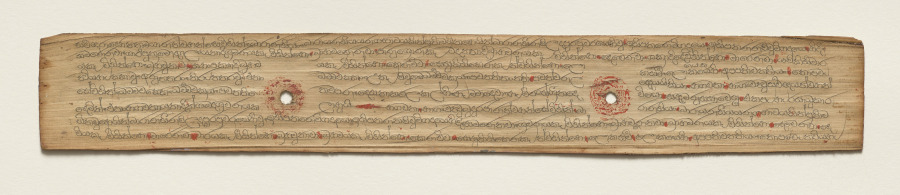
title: Leaf from a Buddhist Manuscript (verso)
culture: Sri Lanka, Singhalese, Late 17th century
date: c. 1700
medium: fiber paper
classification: Manuscript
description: Palm leaf material is still used for manuscripts in Sri Lanka. The palm leaves are prepared first by boiling them, drying them in the sun, and then rubbing them with oils. Scribes then use a metal stylus to incise the text. Then charcoal powder is wiped across the pages, filling in only the inscribed lines.